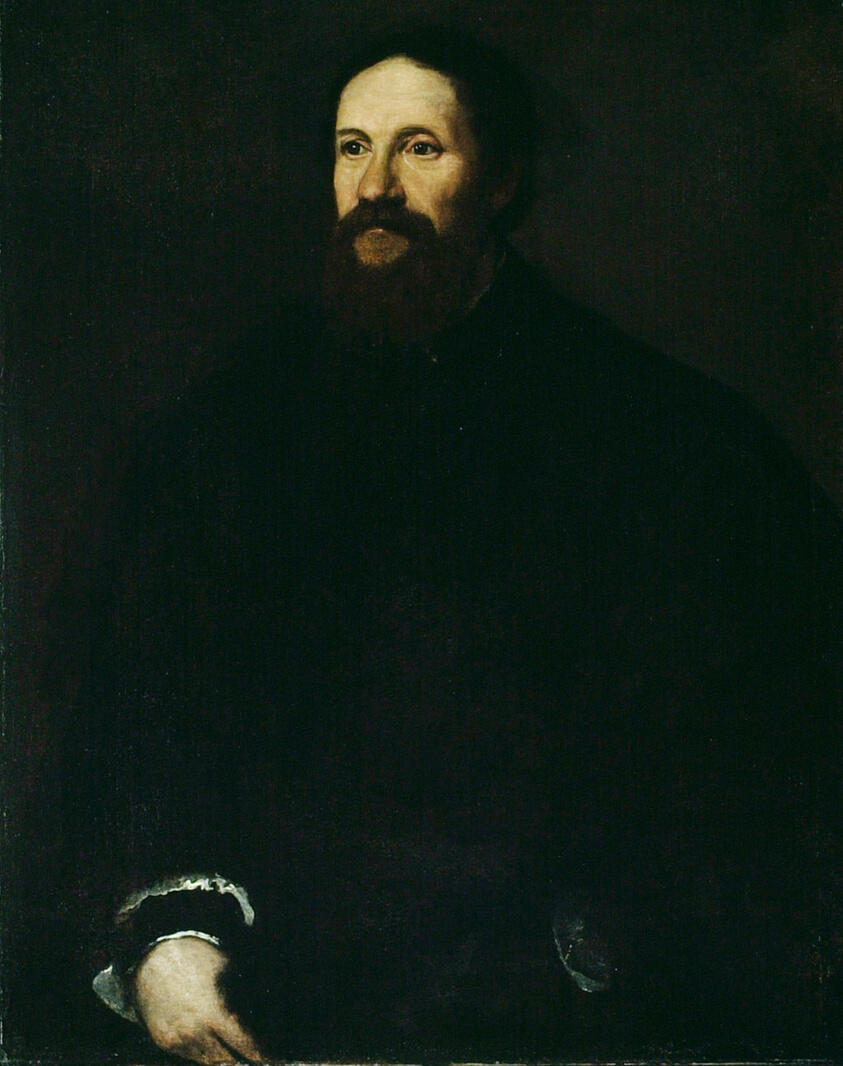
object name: Painting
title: Portrait of a Gentleman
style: 16th Century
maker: Venetian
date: c. 1545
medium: Oil on canvas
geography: Italy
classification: oil on canvas; portrait; Italian; paint; painting; european painting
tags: portraits: male subject, man, portrait, shadows